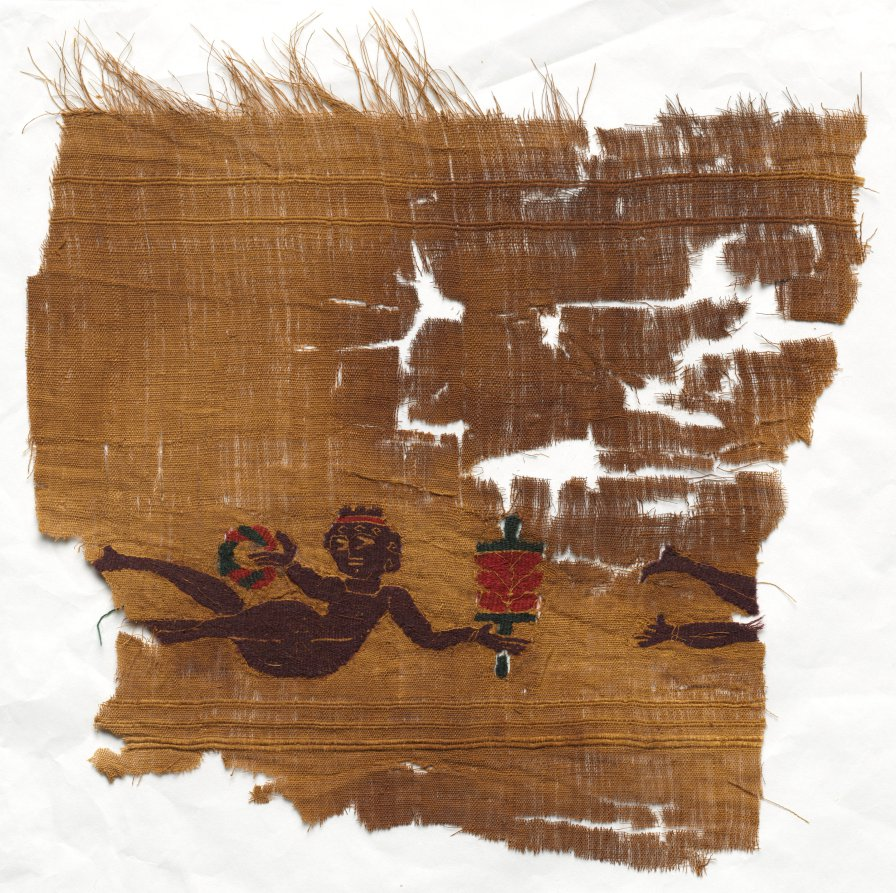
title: Fragment of a Curtain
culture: Egypt, Byzantine period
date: early 400s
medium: tabby weave, inwoven tapestry ornament; wool and linen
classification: Textile